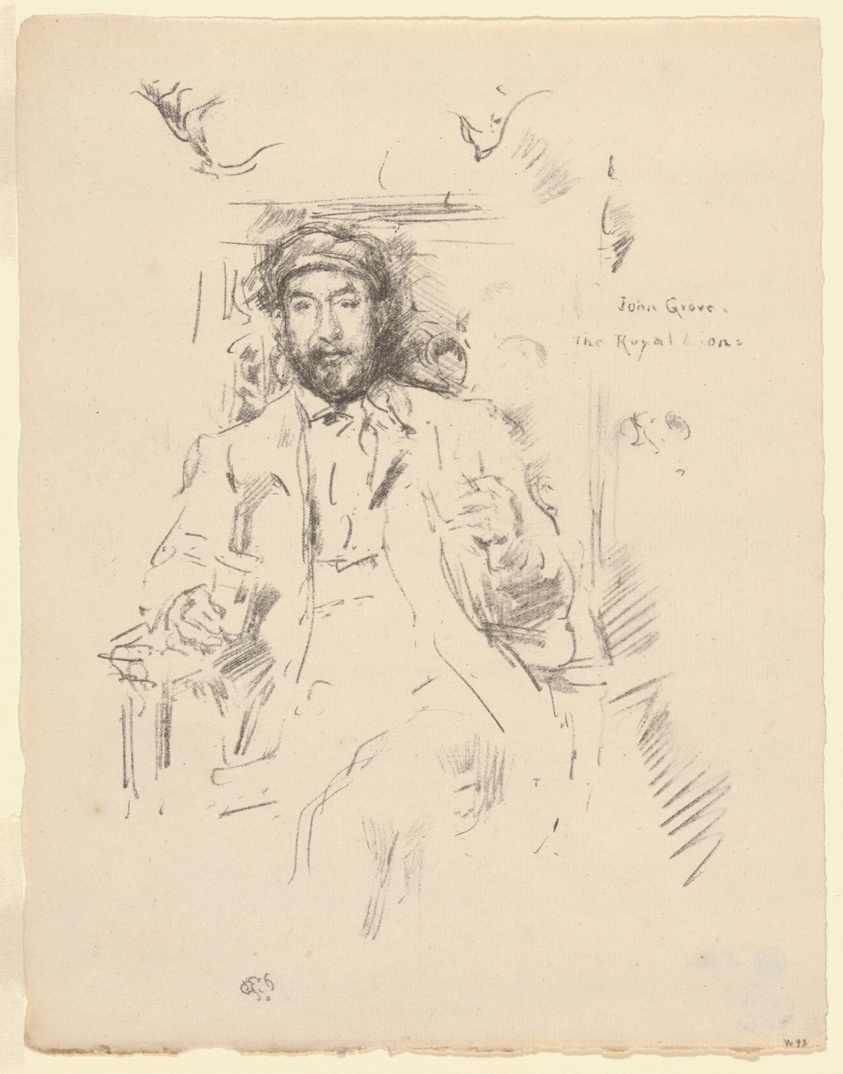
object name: Print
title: John Grove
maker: James McNeill Whistler (American, 1834-1903)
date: 1895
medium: Transfer lithograph in black on ivory laid paper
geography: United States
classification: transfer lithograph; lithograph; print; prints and drawing; paper